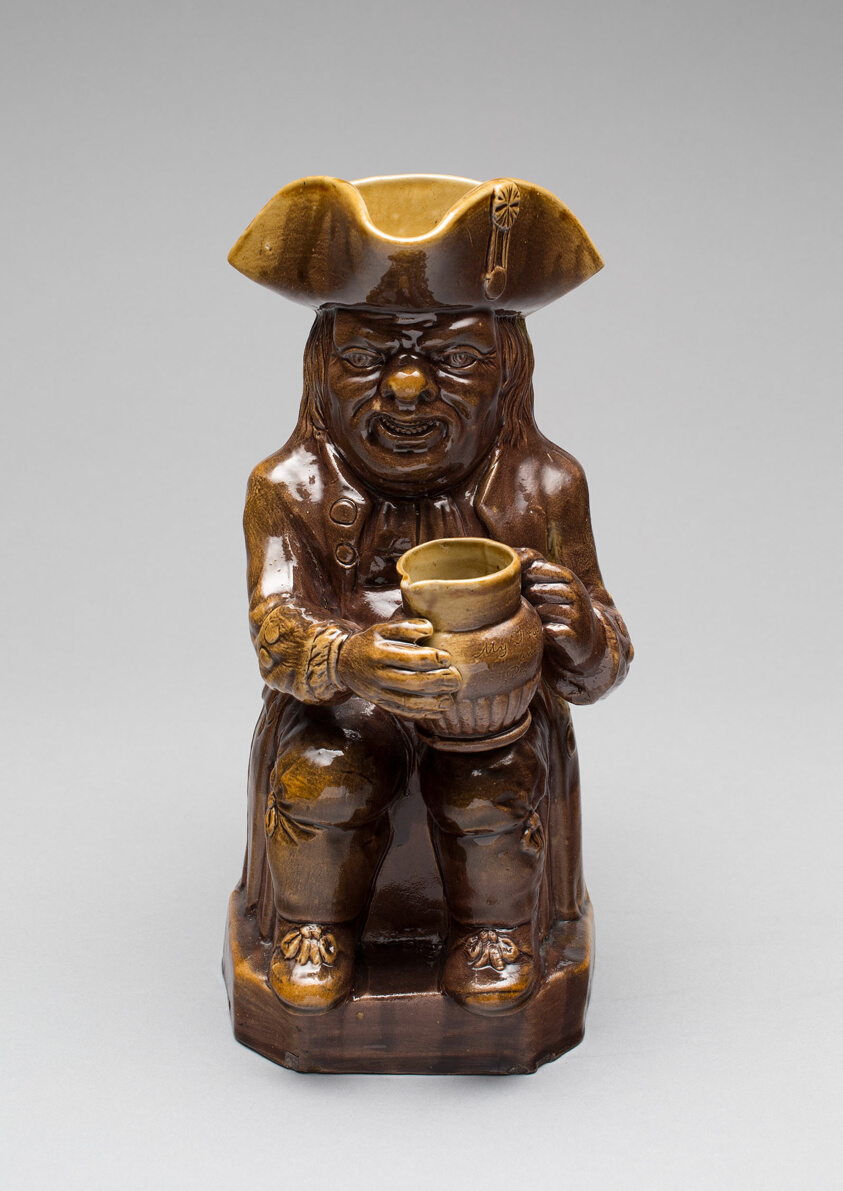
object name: Decorative Arts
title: Toby Jug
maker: D. & J. Henderson Co.; American, 1828–1833; Jersey City, New Jersey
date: 1828–30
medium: Earthenware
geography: New Jersey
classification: vessel; stoneware; ceramics; american decorative arts; american arts; decorative arts